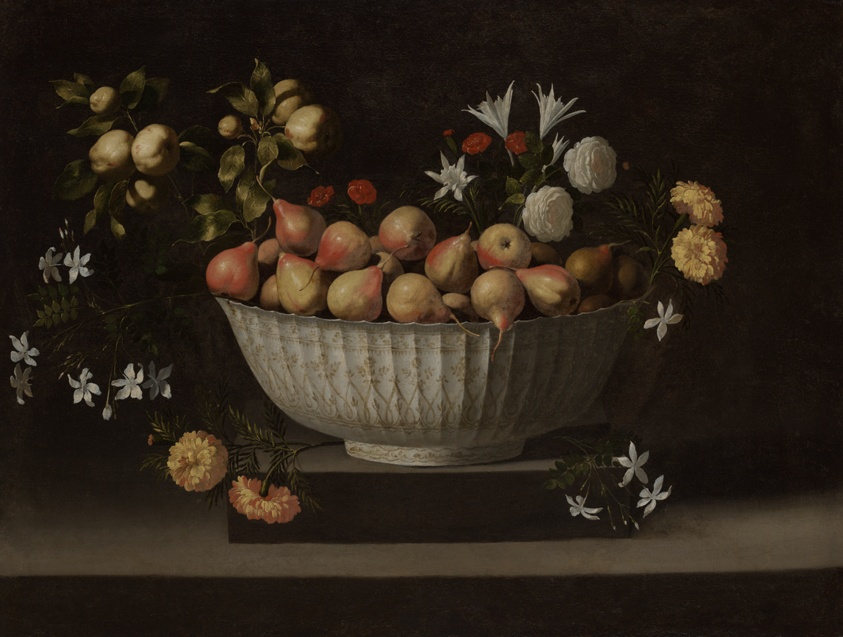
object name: Painting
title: Flowers and Fruit in a Chinese Bowl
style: 17th Century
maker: Juan de Zurbarán (Spanish, 1620–1649)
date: c. 1645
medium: Oil on canvas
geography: Spain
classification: oil on canvas; oil paintings (visual works); paint; spanish; painting; european painting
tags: still life, porcelain, bowl, Chinese, flowers, foliage, fruit, pears